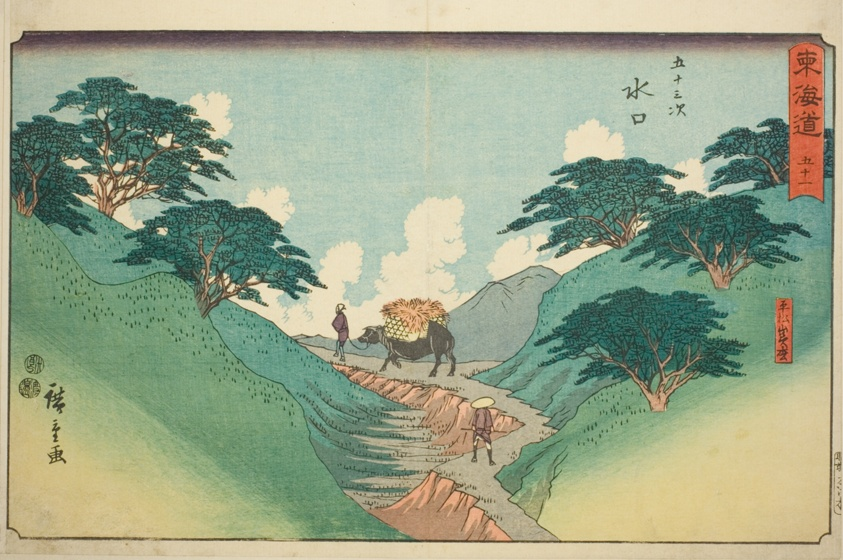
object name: Print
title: Minakuchi: The Beautiful Pine Trees at Mount Hiramatsu (Minakuchi, Hiramatsuyama bisho)—No. 51, from the series "Fifty-three Stations of the Tokaido (Tokaido gojusan tsugi)," also known as the Reisho Tokaido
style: Japanese (culture or style)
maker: Utagawa Hiroshige 歌川 広重; Japanese, 1797-1858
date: c. 1847/52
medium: Color woodblock print; oban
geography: Japan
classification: woodblock print; print; asian art